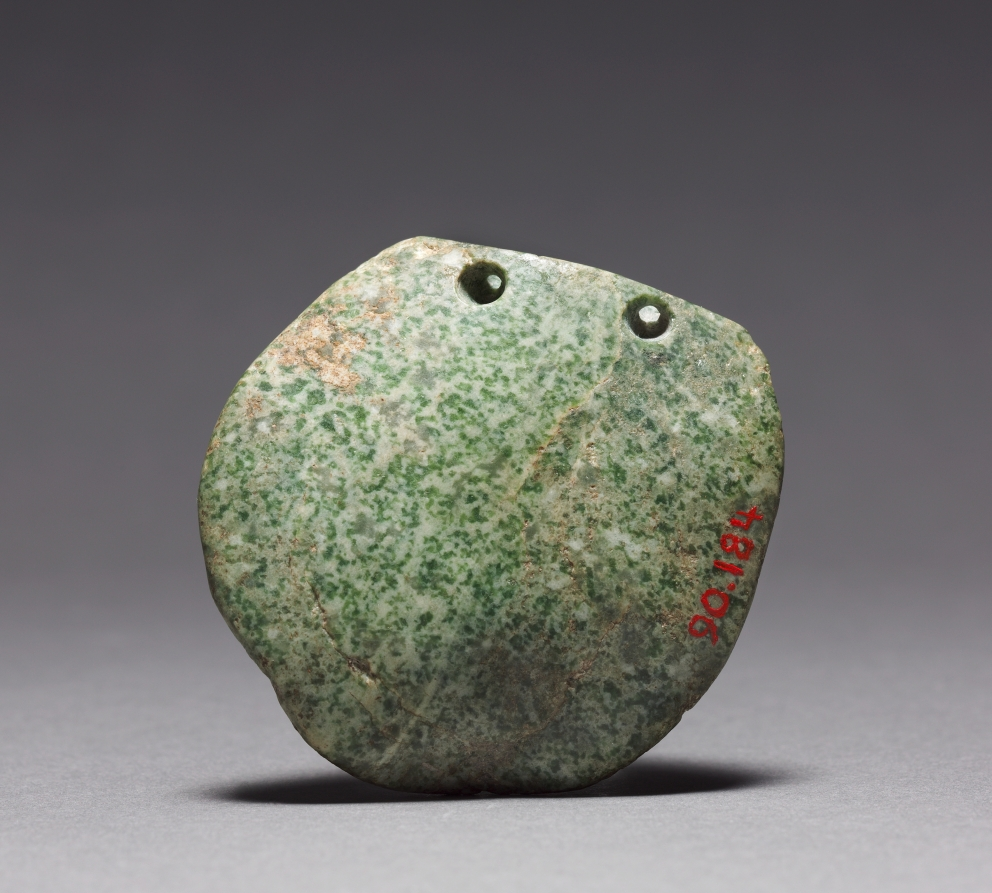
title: Head Pendant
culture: Mesoamerica, Mexico, Guerrero, Mezcala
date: 100 BCE–300 CE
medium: polished green stone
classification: Sculpture